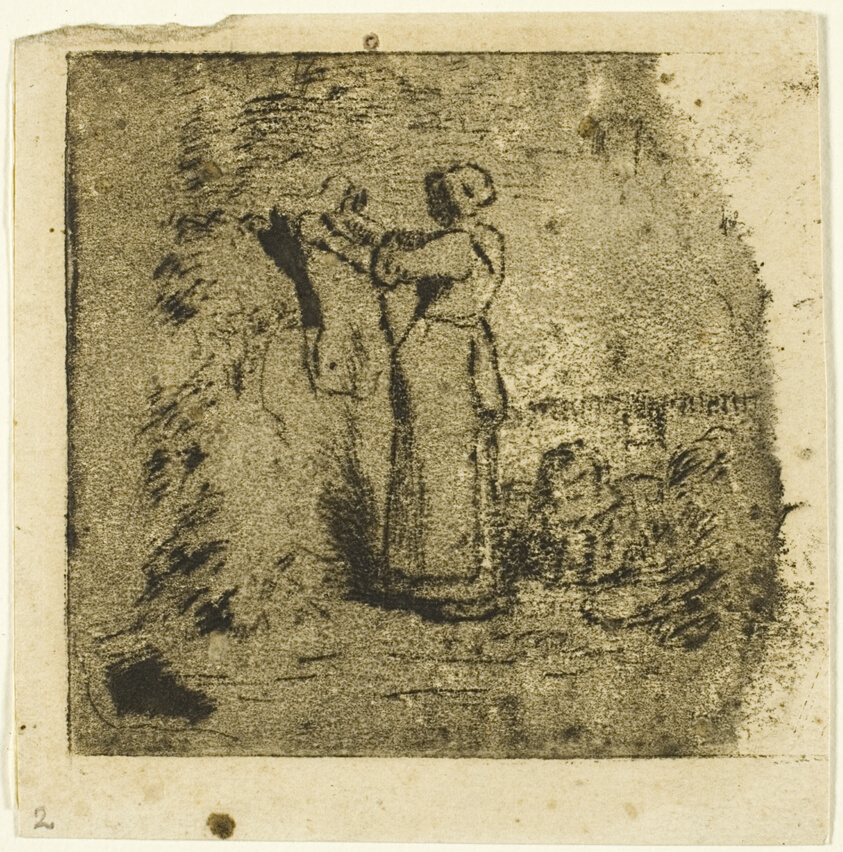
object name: Print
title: Peasant Resting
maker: Jean François Millet (French, 1814-1875)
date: c. 1855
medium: Etching, with graphite additions and graphite sketch on verso, on ivory wove paper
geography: France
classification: etching; print; prints and drawing